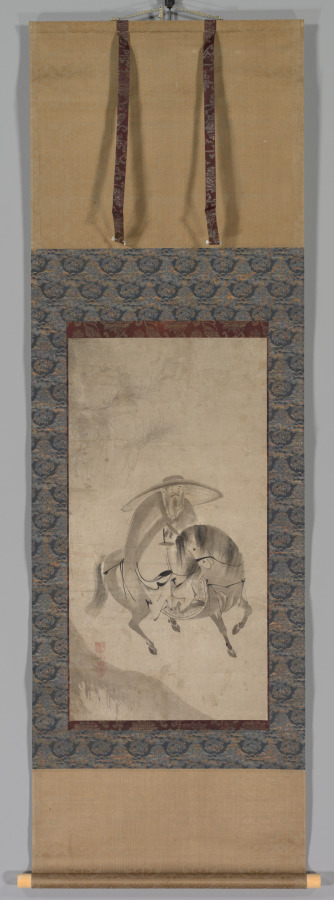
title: Su Dongpo Riding a Donkey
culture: Japan, Momoyama period (1573–1615)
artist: Reietsu (Japanese, active late 1500s to early 1600s)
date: late 1500s to early 1600s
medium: hanging scroll; ink on paper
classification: Painting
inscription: 落款 秀景 ？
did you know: Su Dongpo 蘇東坡 (1037–1101) was the leading Song dynasty poet and artist.